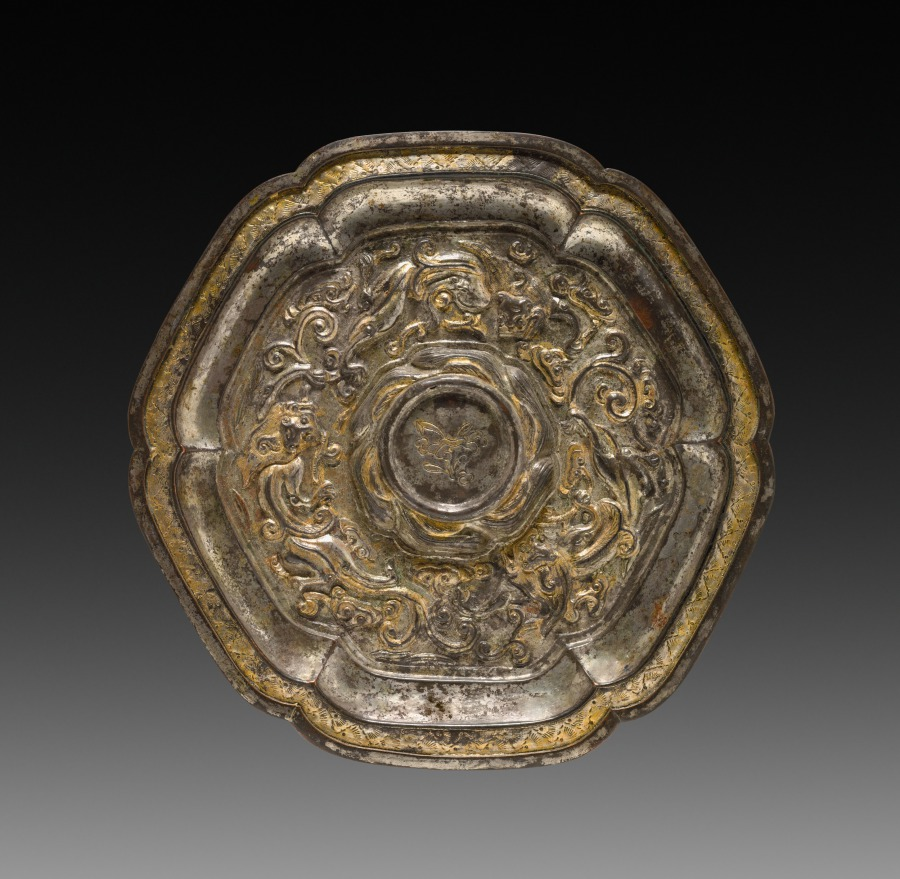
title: Cup Stand with Dragons amid Fungus Scrolls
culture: China, Yuan dynasty (1271-1368)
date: 14th Century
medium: silvered and gilt copper with repoussé design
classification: Metalwork